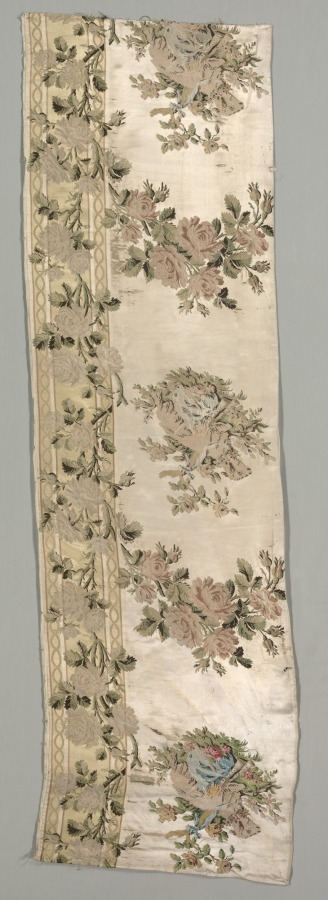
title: Length of Brocaded Satin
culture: France, 18th century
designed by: Philippe de Lasalle (French, 1723–1805)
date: c. 1780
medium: satin, brocaded; silk with areas of chenille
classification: Textile